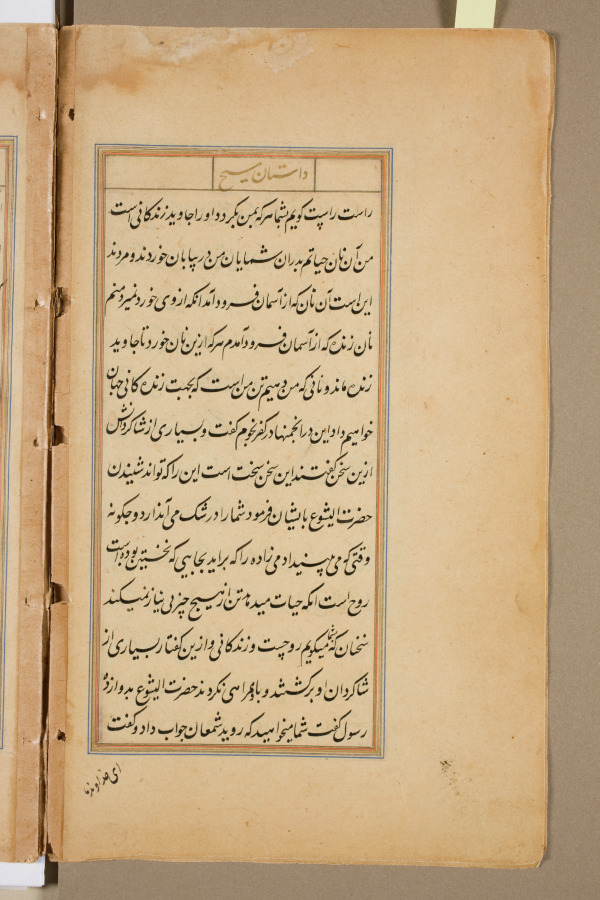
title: Text page from a Mirror of Holiness (Mir’at al-quds) of Father Jerome Xavier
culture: Mughal India, Allahabad, made for Prince Salim (1569–1627)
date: 1602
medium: Ink and gold on paper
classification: Manuscript